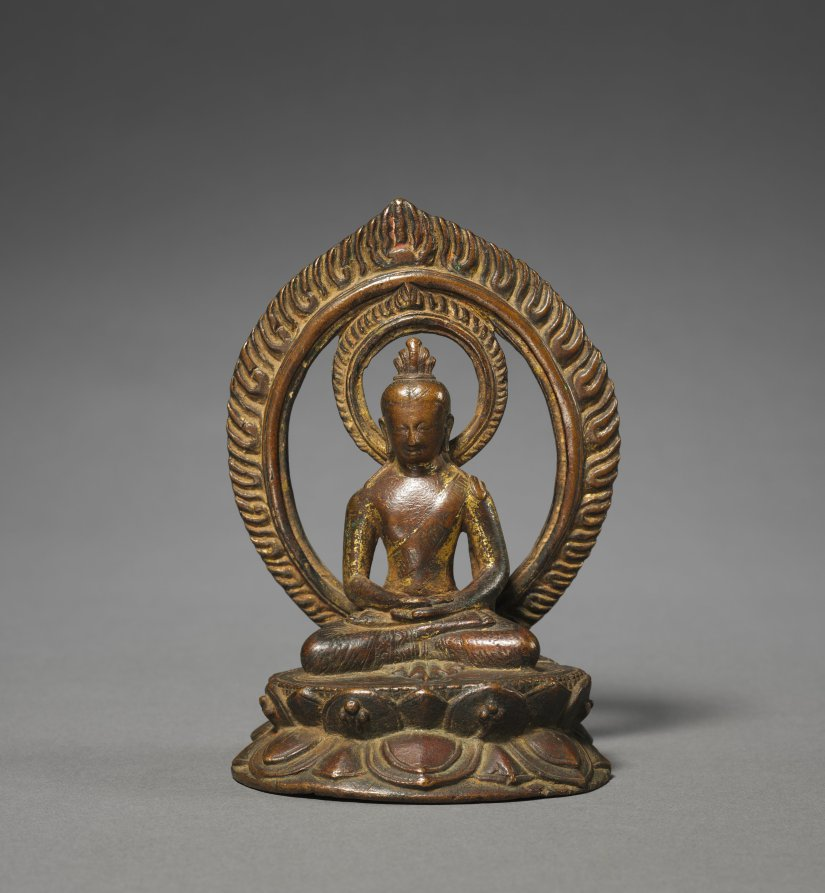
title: Vak, an Emanation of the Buddha Amitabha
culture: Nepal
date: 900s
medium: bronze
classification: Sculpture